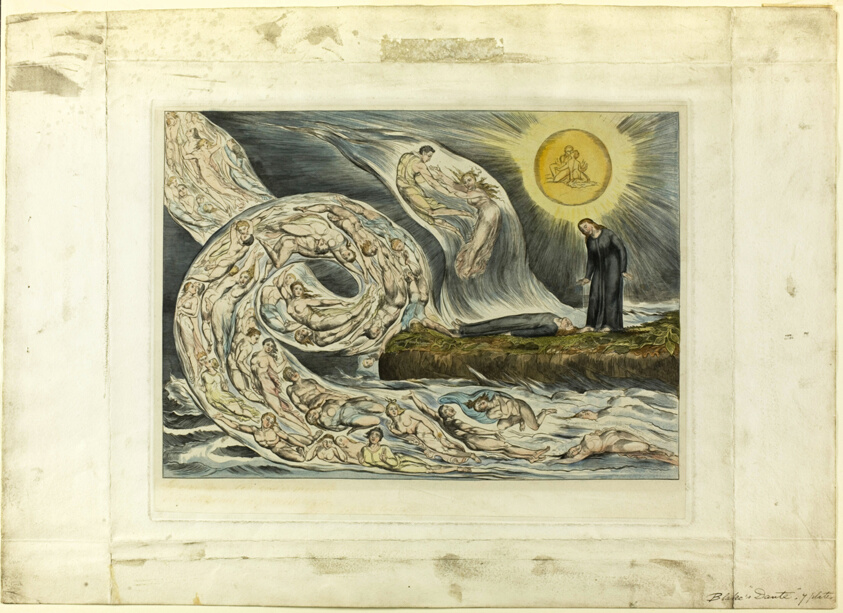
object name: Print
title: The Circle of the Lustful: Paolo and Francesca. Inferno, canto V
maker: William Blake (English, 1757-1827)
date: 1827, printed c. 1892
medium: Hand-colored engraving on India paper, laid down on wove paper (chine collé)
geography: England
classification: engraving; paper; print; prints and drawing